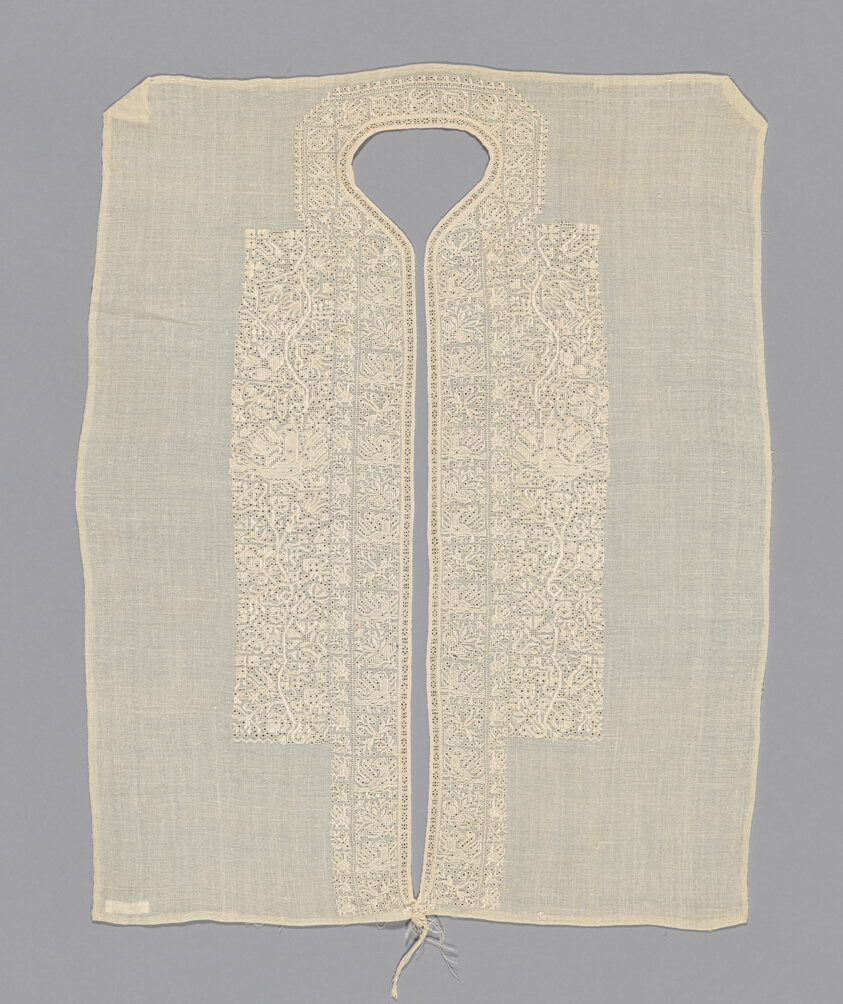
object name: Textile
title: Neck Insert or Dress Front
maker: Greece, Ionian Islands, Leukas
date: 1700/1900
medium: Linen, plain weave; embroidered with linen in eyelet hole, double hem, overcast, and satin stitches; insets of linen, needle lace; edged with linen, twill oblique interlacing tape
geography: Greece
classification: textile; needlework (visual works)